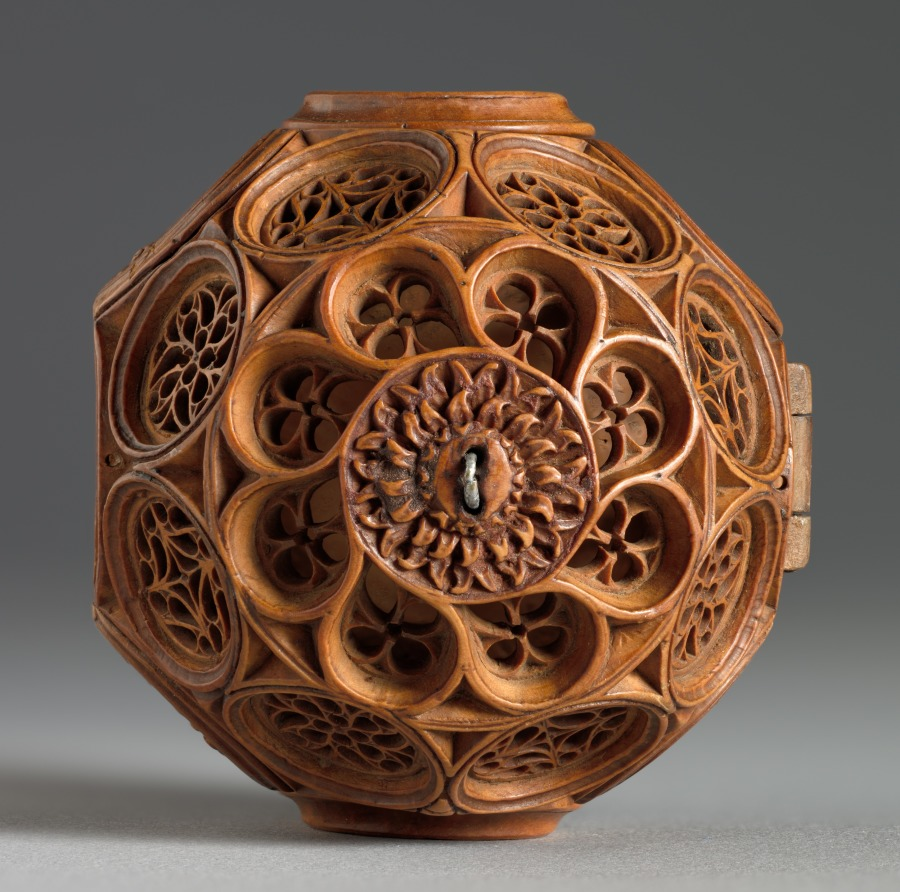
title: Prayer Nut with Scenes from the Life of St. James the Greater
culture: Northern Netherlands (Holland)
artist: Adam Dircksz (Netherlandish, active c. 1500)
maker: and Workshop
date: c. 1500–1530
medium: boxwood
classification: Sculpture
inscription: Interior around lower half: SANCTVS SACRILEGI STAT IVDICIS ANTE TRIBVNAL (Holiness stands before the throne of the profane judge)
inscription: Interior, around upper half: GAVDENS PRO CRISTO IACOBVS SVBDIT CAPVT ENSI (St James submits his head to the sword)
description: Prayer nuts are capsules that can be opened in half and were mainly worn from the end of the 1400s until 1530, particularly in the Netherlands. These objects are generally made from boxwood and carved with extreme refinement and delicacy. They often echo Gothic architecture and include openwork tracery or elaborate decorative patterns. Prayer nuts came into fashion for private devotion as a pendant on the rosary or on a decorative chain. The emergence of prayer nuts went hand in hand with the practice of praying the rosary more frequently at the end of the Middle Ages.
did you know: This miniature masterpiece was held and caressed within the palm of the holder as they prayed and meditated on their faith. What do you use to focus or engage in quiet concentration?